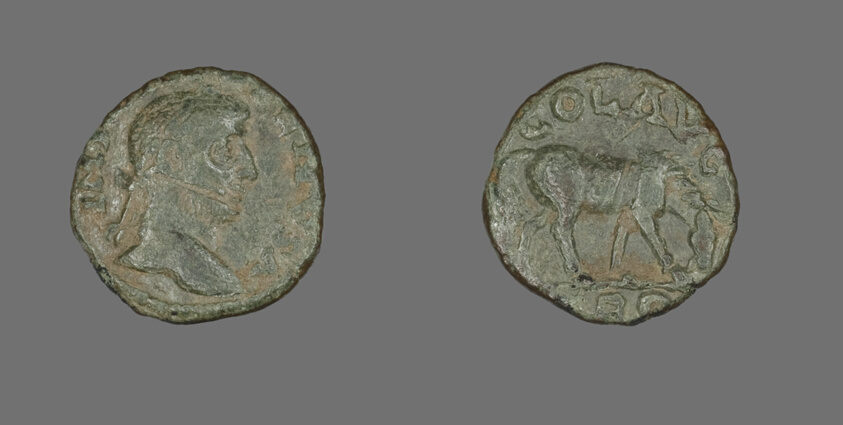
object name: Coin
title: Coin Portraying Emperor Gallienus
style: roman (ancient, style or period), ancient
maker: Roman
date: 253-268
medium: Bronze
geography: Roman Empire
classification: coin; ancient art